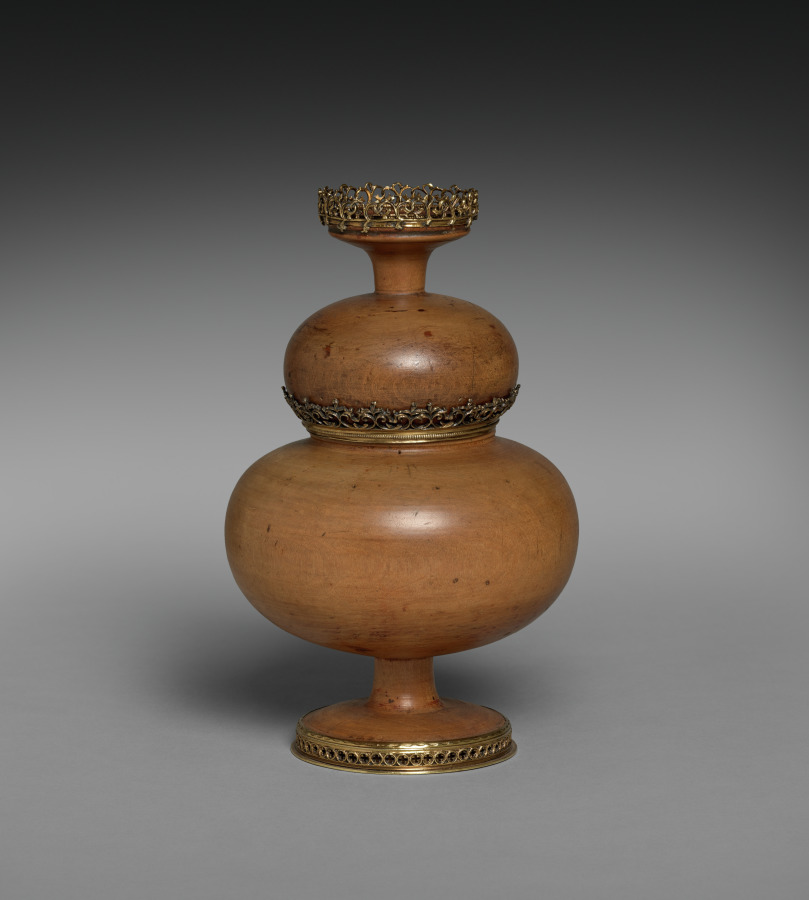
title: Double Cup (Mazer)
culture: Germany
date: c. 1530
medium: maple wood with gilt-silver mounts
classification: Wood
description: A characteristic form of drinking vessel made of close-grained wood, especially maple, was developed in Germany as early as the thirteenth century. It consisted of a larger cup with a foot and a handle and a smaller cup on top. The upper one served as a lid but could also be removed and used as a separate drinking vessel. In this example the smaller upper cup is inset with a memorial portrait medallion of Albrecht Dürer made in the year of his death, 1528. The medal is the work of Matthes Gebel who was active in Nuremberg and Augsburg as a medallist from 1523 to his death in 1574. The reverse of the medal is set into the base of the larger lower cup.